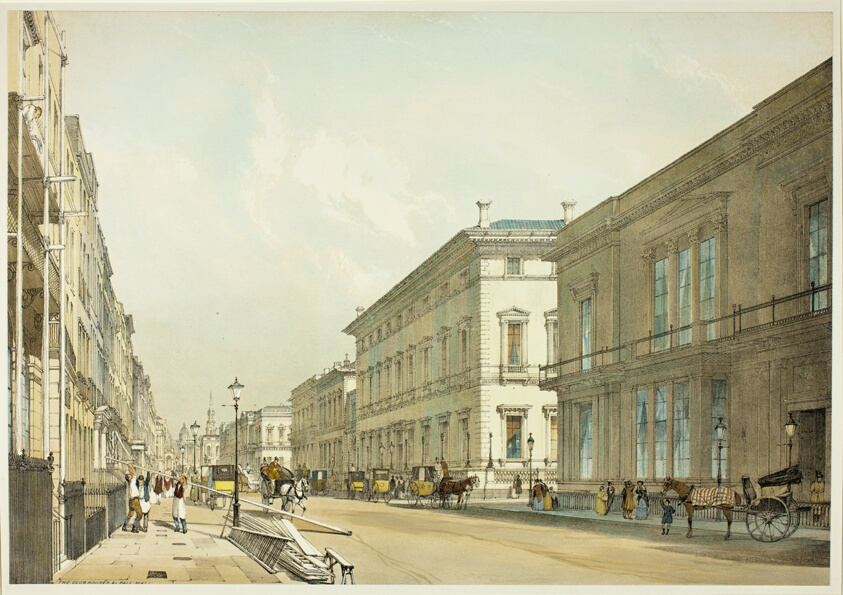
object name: Print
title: The Club Houses and Pall Mall, plate thirteen from Original Views of London as It Is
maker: Thomas Shotter Boys (English, 1803-1874); designed by Charles Ollier (English, 1788-1859)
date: 1842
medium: Hand-colored lithograph on paper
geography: England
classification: lithograph; print; prints and drawing